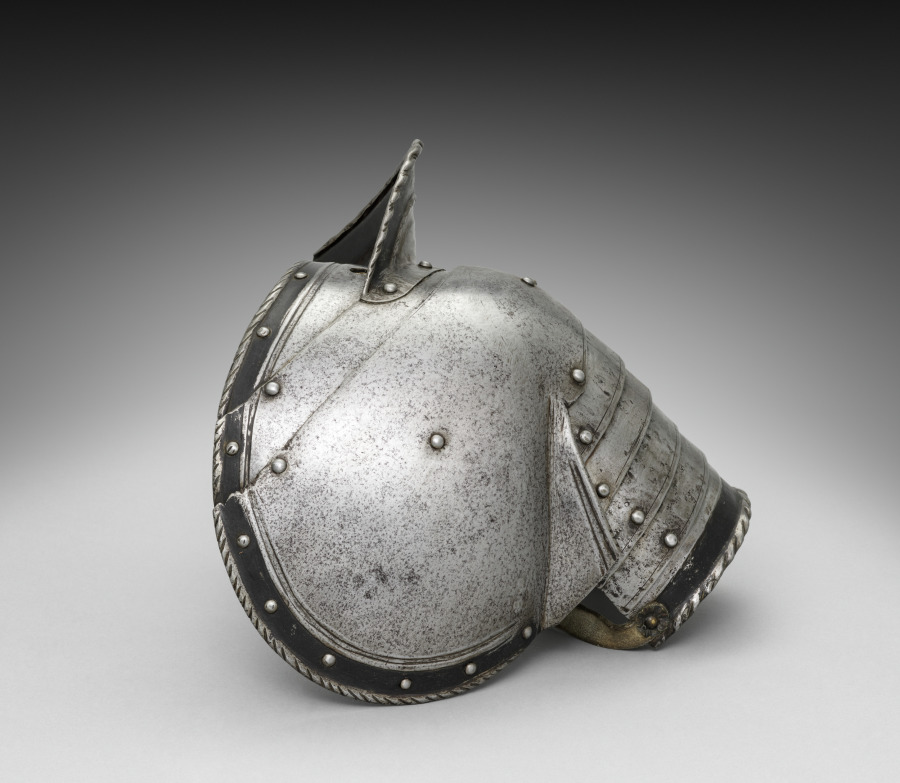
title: Right Pauldron with Guard Brace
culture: Germany, 19th century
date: 1801–1900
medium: steel with black paint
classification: Arms and Armor